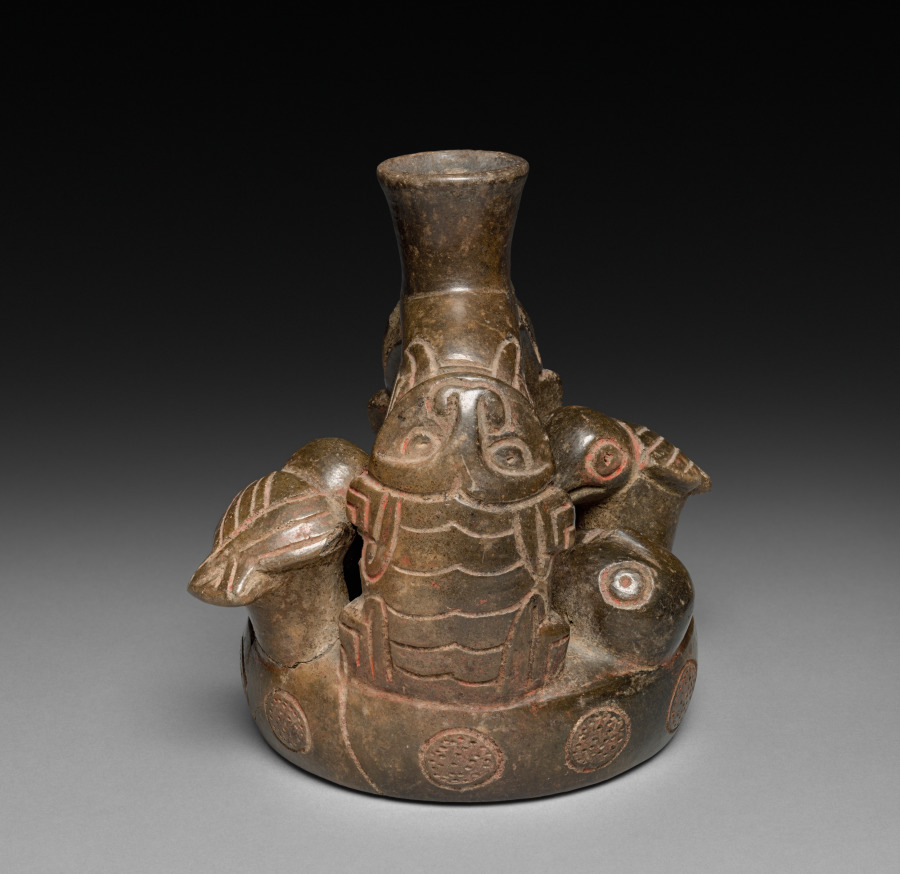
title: Vessel with Reclining Figure and Birds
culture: Andes, north coast, Cupisnique style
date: 2200–200 BCE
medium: Ceramic, pigment (cinnabar?)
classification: Ceramic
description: This ceramic vessel features a supine human being pecked by two birds that perch on the vessel’s doughnut-shaped chamber. The identity of the apparently mythical creature modeled in low relief on the sides of the stirrup-shaped spout is unknown. Little can be said about meaning beyond pointing out an obvious reference to death.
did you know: The stirrup-shaped form of the spout is common among Peruvian ceramics and unique to the ancient Americas.